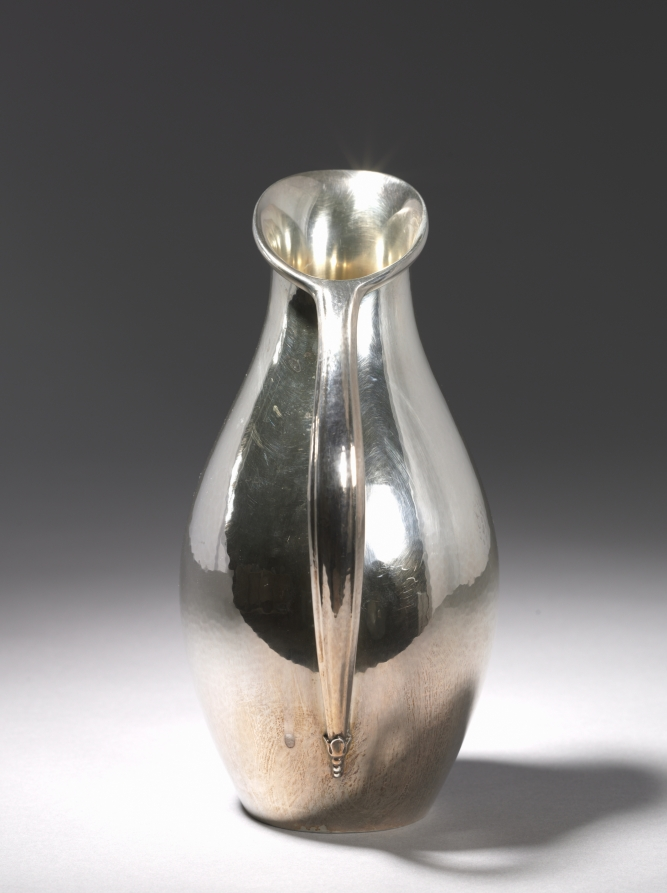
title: Water Pitcher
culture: Denmark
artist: Georg Jensen (Danish, 1866–1935)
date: c. 1950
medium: silver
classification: Silver